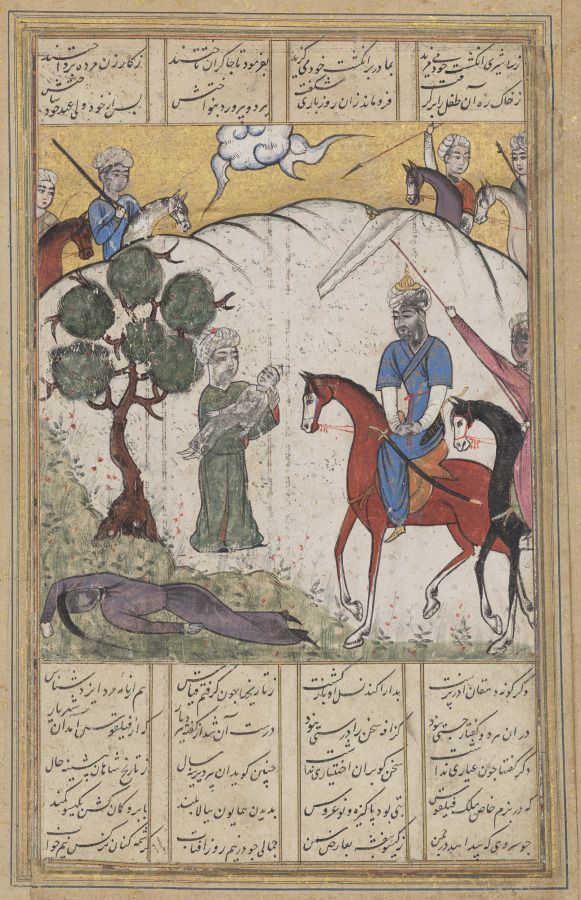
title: A scene of the life of Alexander from the Sharaf-nameh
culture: Iran, probably Shiraz, Safavid period (1501-1722)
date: 1500s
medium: Opaque watercolor, ink, and gold on paper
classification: Manuscript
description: This rare scene from the life of Alexander depicts a poor and pious woman falling into a desperate situation and giving birth to a son in some desolate place. Philip, the Macedonian ruler, is on a hunt and passes the ruin. Seeing the deceased woman with a hungry baby by her side, the King orders his followers to tend to the burial of the woman and brings up the orphan making him his crown prince.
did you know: This scene is from the Sharaf-nameh, the poetical version of the life of Alexander by the 12th-century Persian poet Niẓāmī Ganjavī.